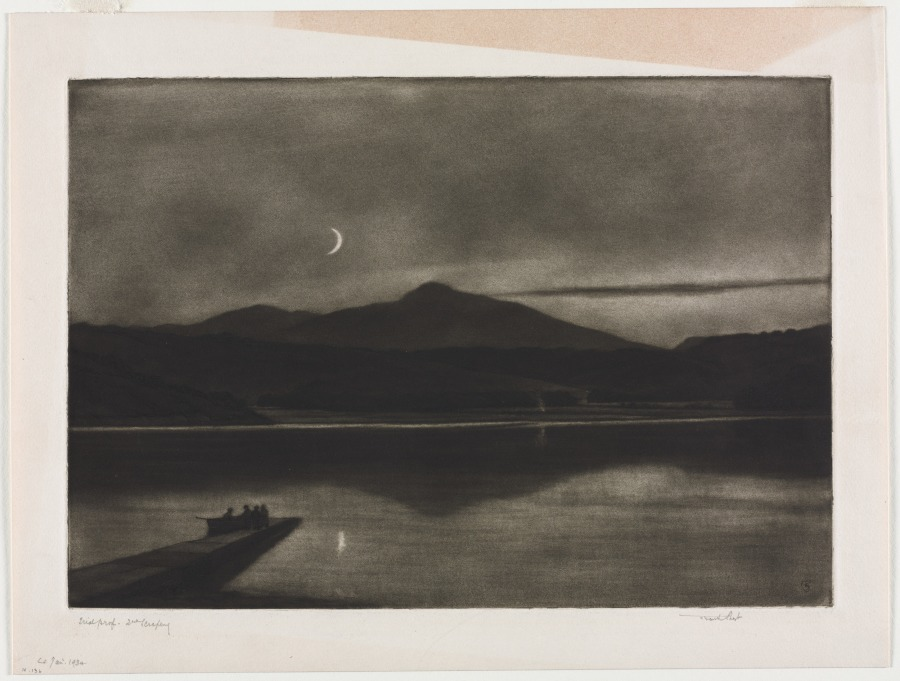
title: Screel Hill and Urr Water from Kypford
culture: England, 20th century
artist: Frank Short (British, 1857–1945)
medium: etching and mezzotint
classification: Print